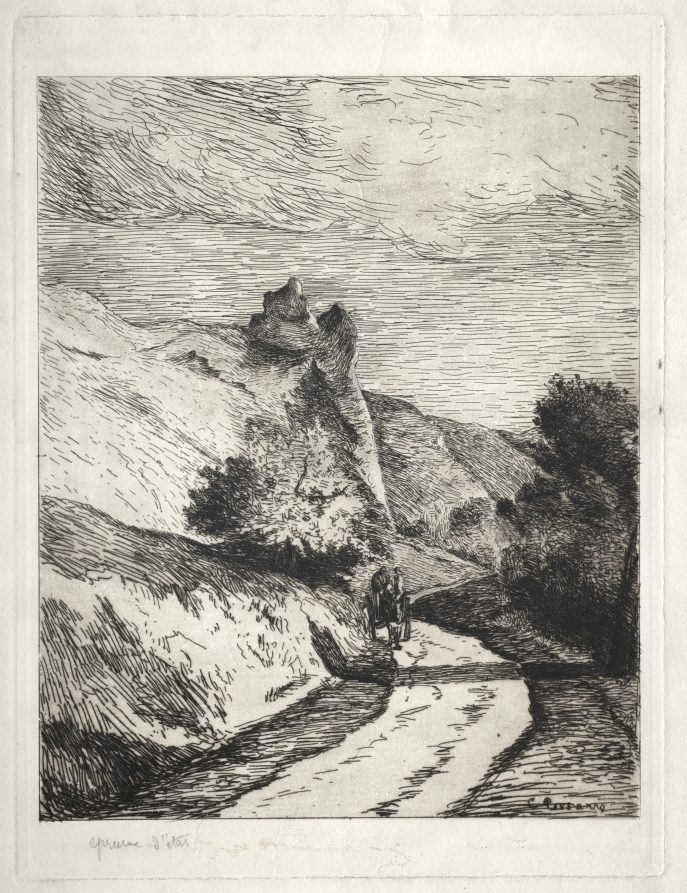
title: La Roche-Guyon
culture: France, 19th century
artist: Camille Pissarro (French, 1830–1903)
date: 1866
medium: etching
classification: Print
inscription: signed, at lower right, in plate: C. Pissarro; inscribed, in pencil, at lower left: epreuve d'état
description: A very early etching by the Impressionist artist Camille Pissarro, this view of the massive rocks at La Roche-Guyon reveals the artist’s painterly attitude toward printmaking. Using only the etched line and a layer of ink left on his printing plate's surface, Pissarro created a dramatic landscape filled with brilliant sunlight and soft shadows.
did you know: Camille Pissarro favored rural life and lived in the small village of La Roche-Guyon during the 1860s, when this print was made.